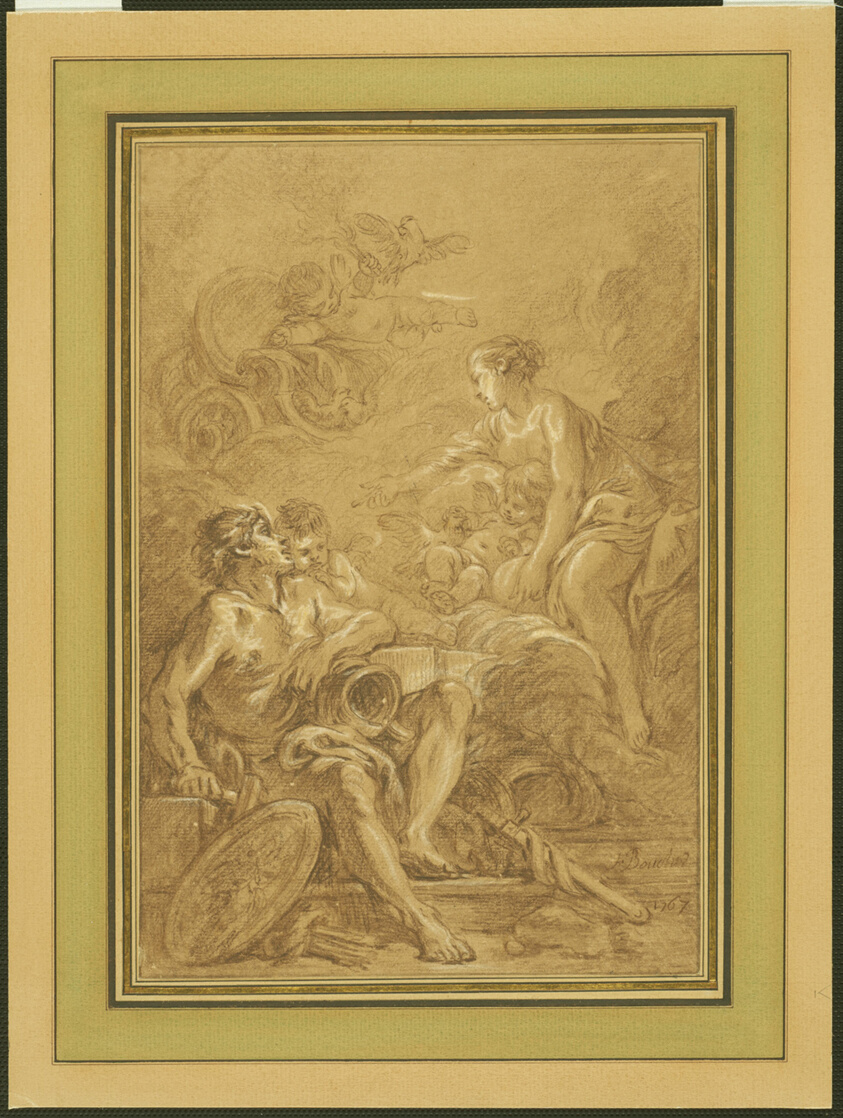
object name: Drawing and Watercolor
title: Venus Commanding Vulcan to Make Arms for Aeneas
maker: François Boucher (French, 1703-1770)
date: 1767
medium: Various brown chalks, with touches of brush and brown chalk wash, heightened with white chalk, on cream laid paper, prepared with a light brown wash ground, laid down on heavy buff laid paper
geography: France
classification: chalk; drawings (visual works); prints and drawing